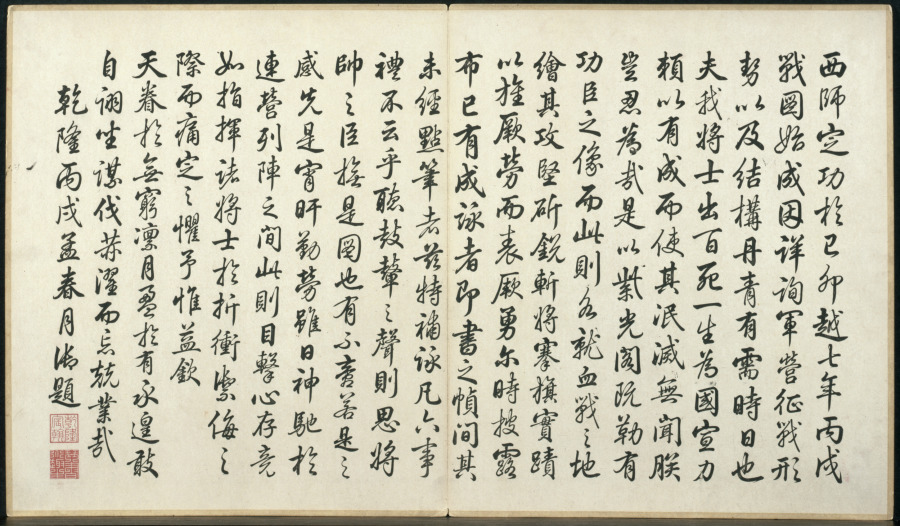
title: Battle Scenes of the Quelling of Rebellions in the Western Regions, with Imperial Poems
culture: China, Qing dynasty (1644–1911), Qianlong reign (1736–95)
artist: Giuseppe Castiglione (Italian, 1688–1766)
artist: Jean Damascene Sallusti (Italian, d. 1781)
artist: Jean Denis Attiret (French, 1702–1768)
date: c. 1765–74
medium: Etchings, mounted in album form, 16 leaves plus two additional leaves of inscriptions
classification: Print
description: This set of etchings was commissioned by Emperor Qianlong to record in pictorial terms the courage of his generals and soldiers in quelling the rebellions in the Western Regions. Qianlong added his own poem to each of the etchings, indicating his appreciation and pride in this demonstration of military might. "Western Regions" refers to the present-day Xingjiang province, often described in Western writing as "Central Asia."